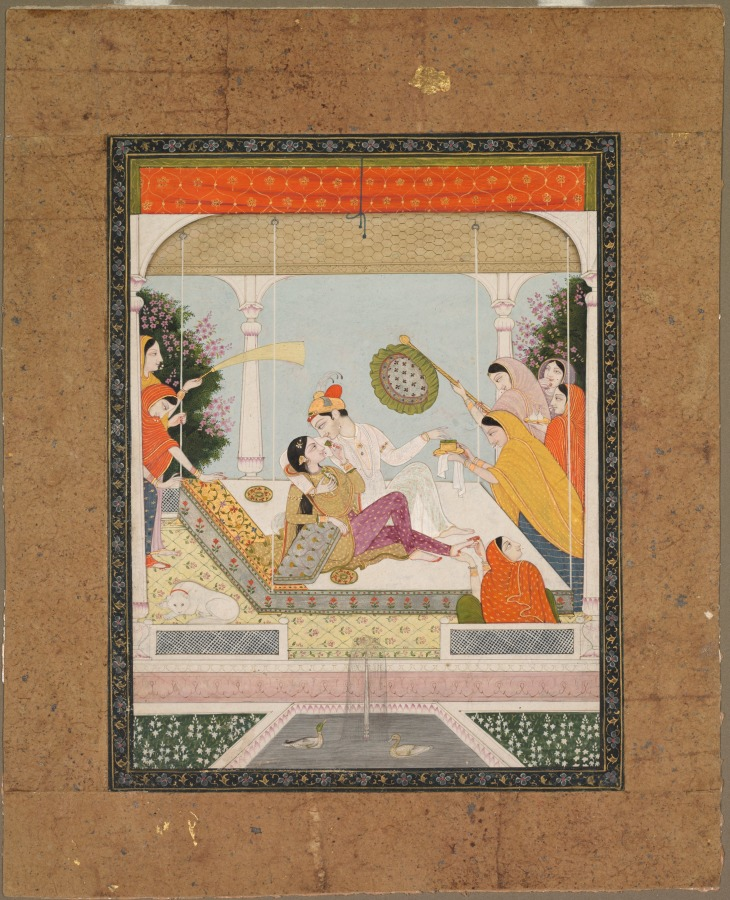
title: Raja with his beloved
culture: Northern India, Pahari kingdoms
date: c. 1790–1800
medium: Gum tempera and gold on paper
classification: Painting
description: The viewer looks through a palace window onto an idyllic scene on an outdoor terrace. A team of attendants minister to a royal couple on a swing. At the upper left one woman keeps flies away with a long-tailed whisk. Next to her, a woman in orange keeps the swing in gentle motion. On the other side, at the lower right, a woman provides a foot massage. At the upper right, one woman holds out a dish of paan; another has small bottles of wine, and another has a fan to provide extra breeze. Finally, a woman in a lavender sari gazes upon the beauty of the scene in admiration.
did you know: The lovers are feeding betel leaf packets (paan), a mild stimulant and breath freshener, to each other.